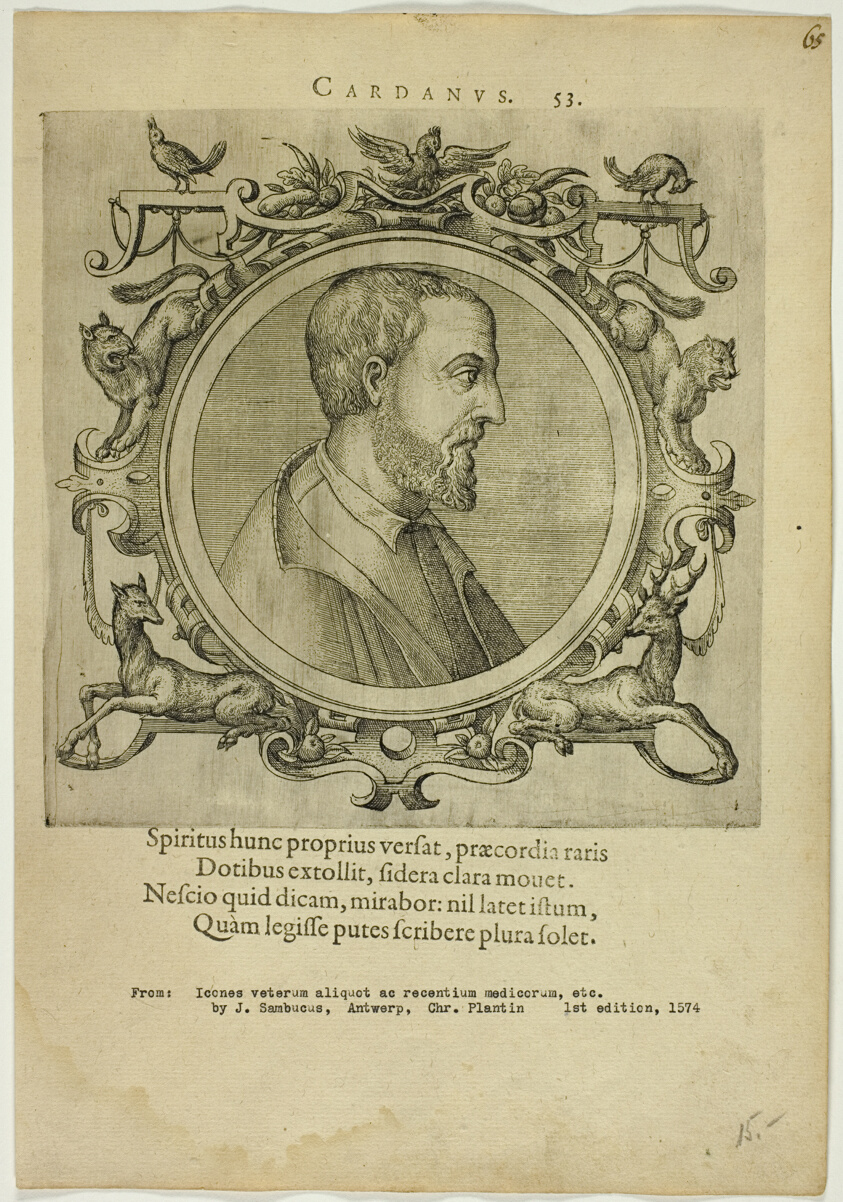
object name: Print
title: Portrait of Cardanus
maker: Unknown Artist (Flemish); written by Johannes Sambucus (Flemish, 1531-1584)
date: published 1574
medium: Etching, with engraving, on cream laid paper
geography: Flanders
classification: etching; print; prints and drawing